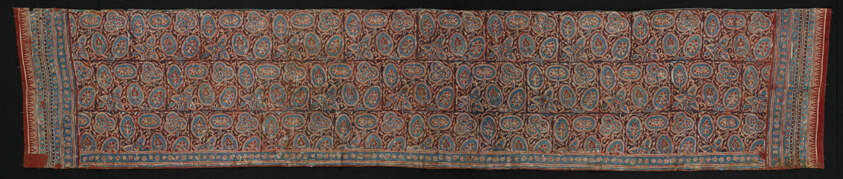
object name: Textile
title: Sacred Heirloom Textile (mawa or ma'a)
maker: Gujarat, India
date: 14th/15th century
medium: Cotton, plain weave; block printed resist and mordant dyed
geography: India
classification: textile; weaving - printed